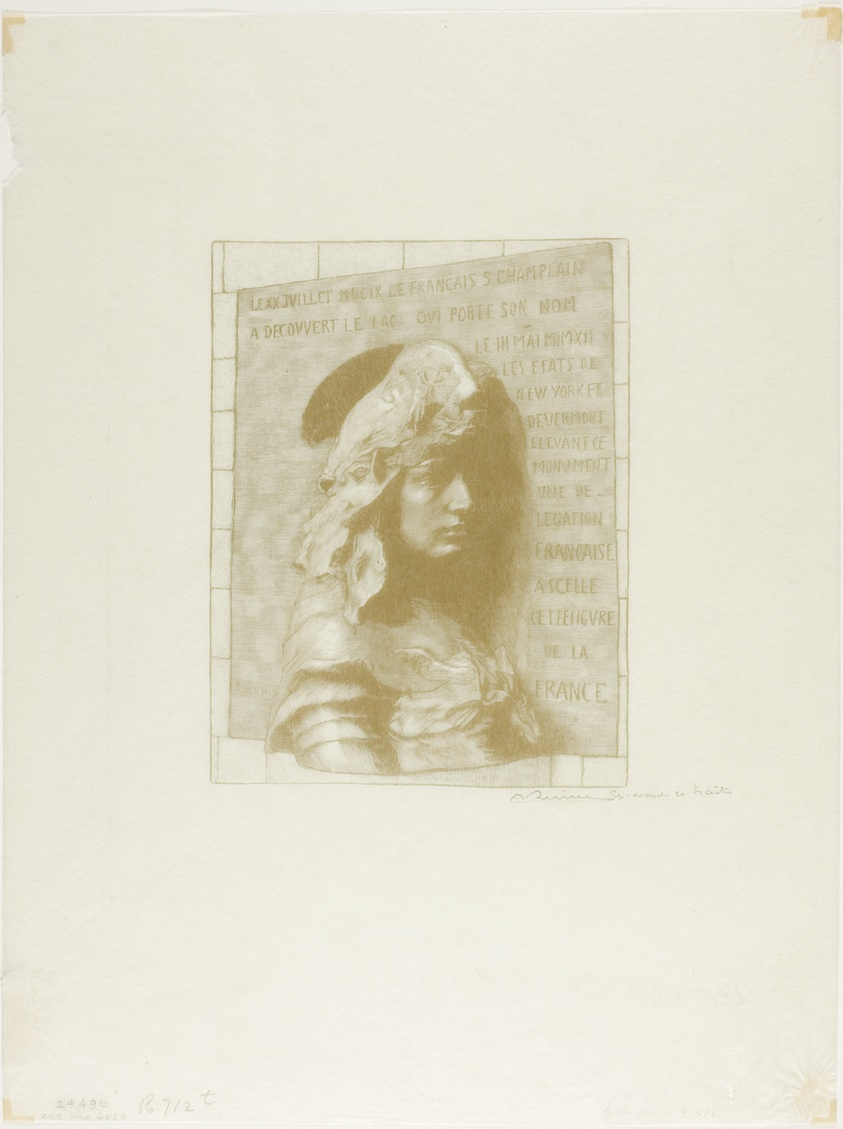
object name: Print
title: La France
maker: Louis Auguste Lepère (French, 1849-1918); after Auguste Rodin (French, 1840-1917)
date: 1912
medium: Wood engraving in warm green-brown on cream wove Japanese tissue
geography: France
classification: wood engraving; print; prints and drawing